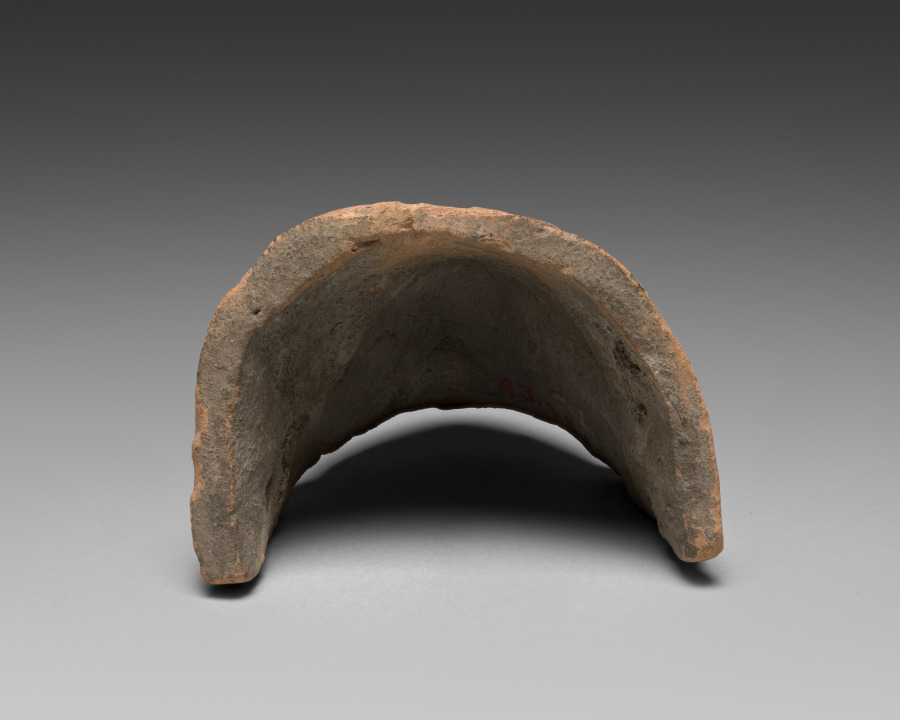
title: Mask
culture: Greece, Sicily, Selinus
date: 550 BCE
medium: terracotta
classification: Sculpture